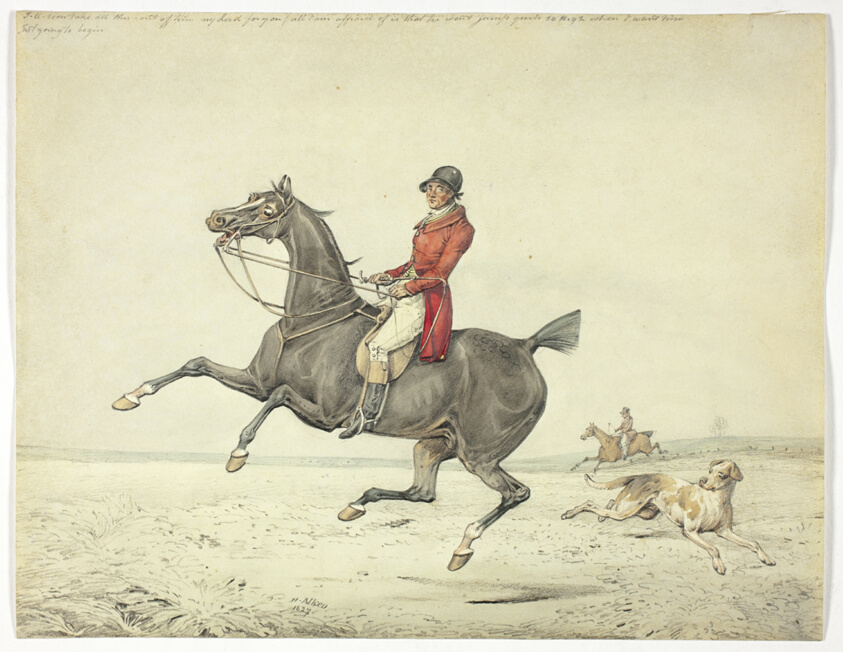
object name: Drawing and Watercolor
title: I'll Soon Take All This Out of Him...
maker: Henry Alken (English, 1785-1851)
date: 1827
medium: Watercolor and graphite on paper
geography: England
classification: watercolor; drawings (visual works); prints and drawing